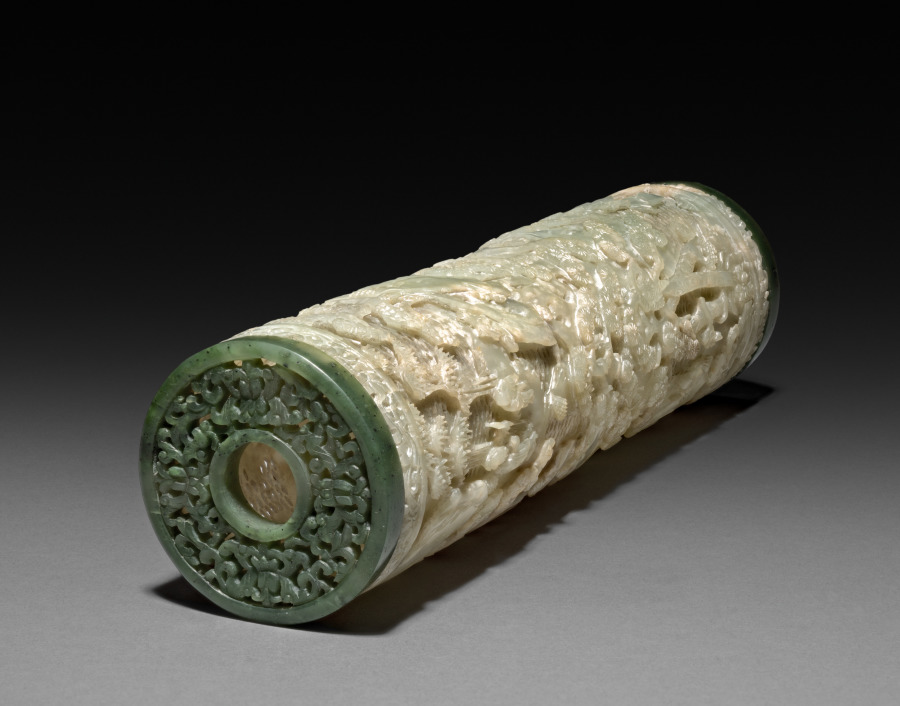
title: Cylinder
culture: China, Qing dynasty (1644-1911) or Republican period (1912-49)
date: 1800–1940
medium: jade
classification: Jade